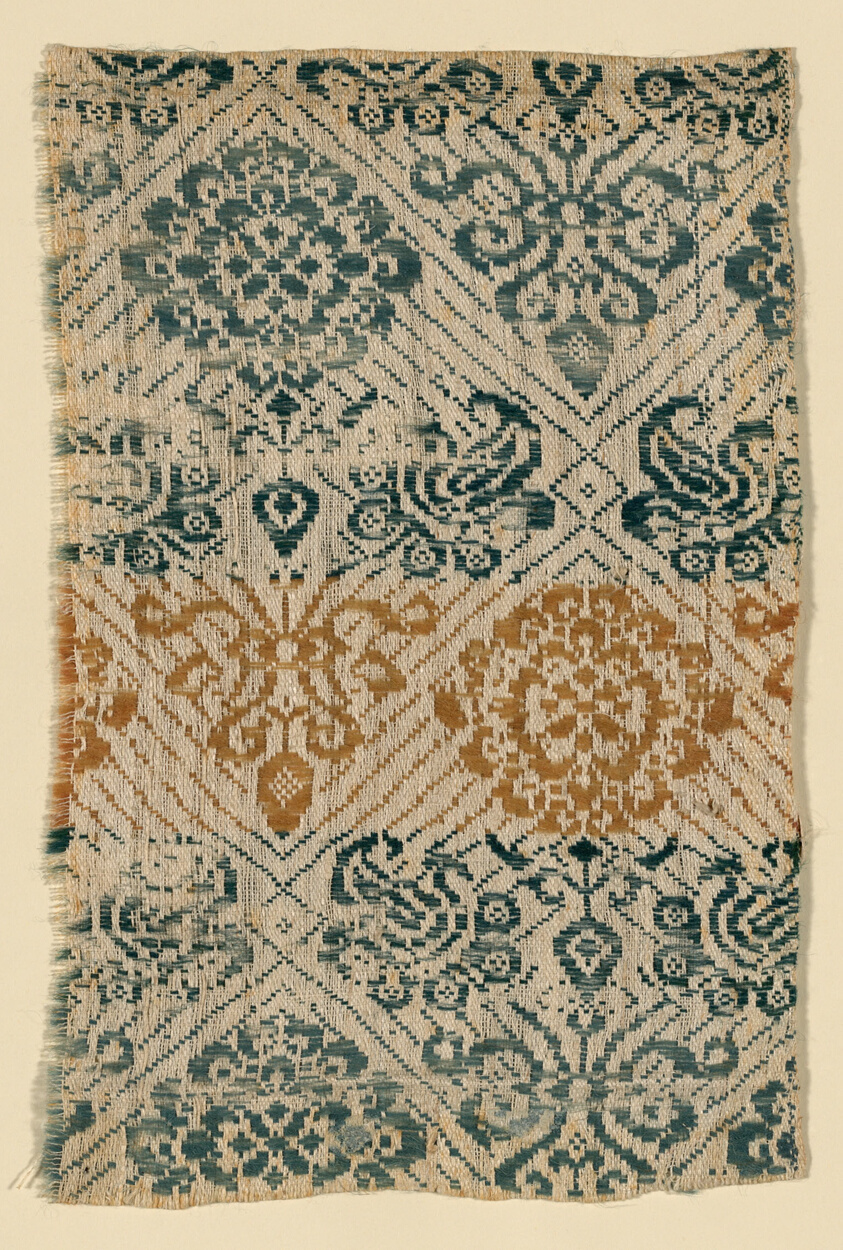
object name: Textile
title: Fragment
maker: Europe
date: 1650/1700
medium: Linen and wool, plain weave with supplementary weft floats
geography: Europe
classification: textile; weaving